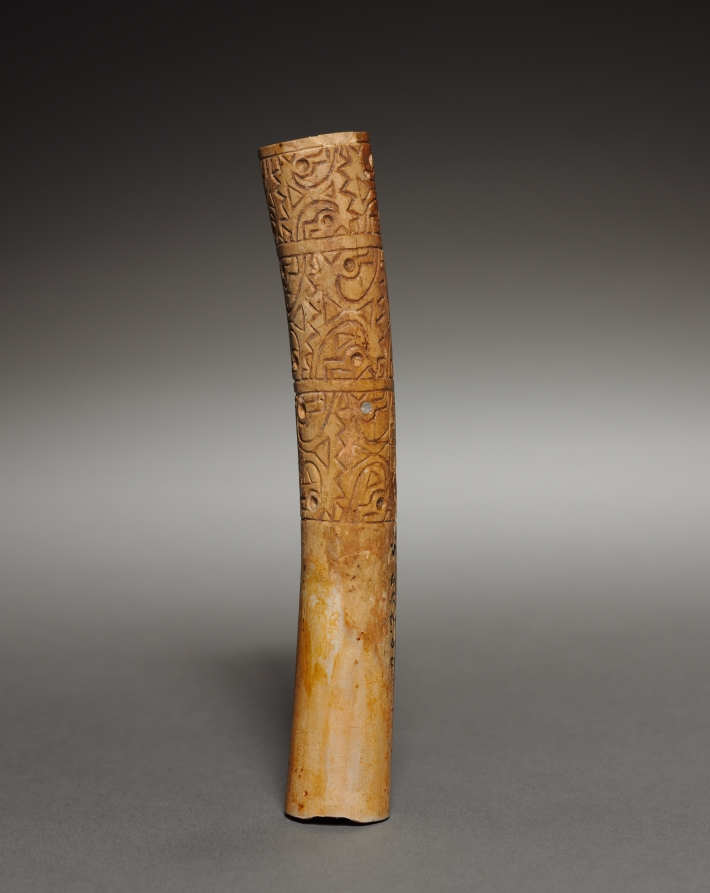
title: Ear Ornament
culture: Peru, Moche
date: 200–550 CE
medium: incised bone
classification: Jewelry